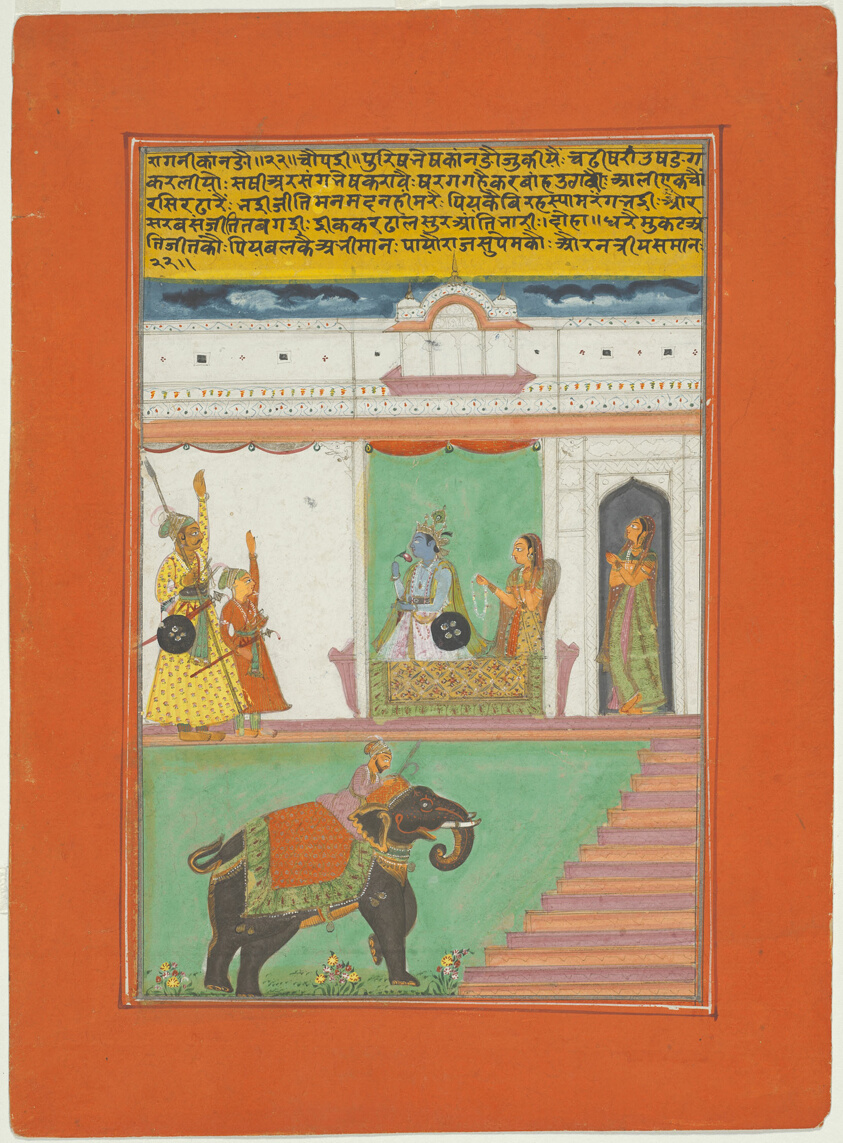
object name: Painting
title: Ragini Kanada, Page from a Jaipur Ragamala Set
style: South Asian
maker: India; Rajasthan, Jaipur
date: c. 1750-1770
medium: Opaque watercolor and gold on paper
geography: Rajasthan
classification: miniature painting; painting; asian art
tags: music, musicians